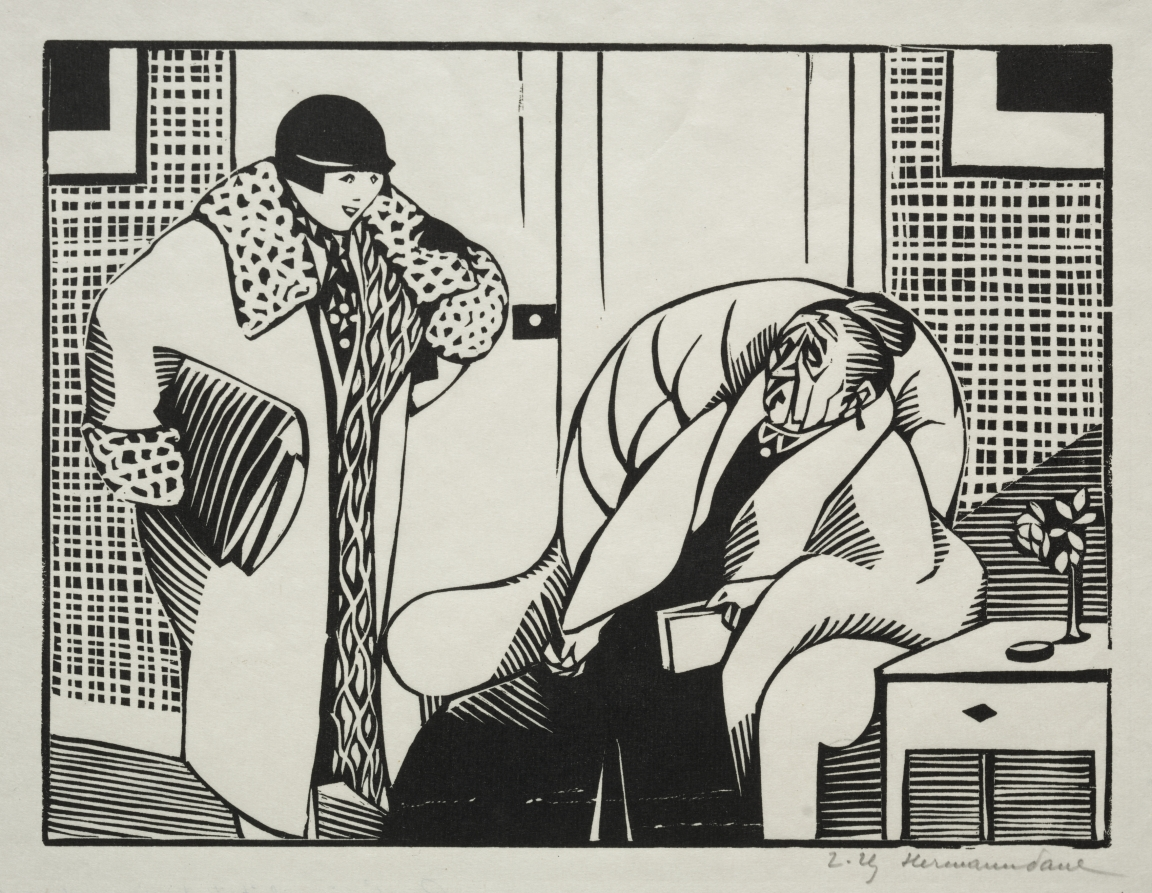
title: Grand'mère, it était passioment aujourd'hui le cours sur Malthus.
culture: France, 20th century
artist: Hermann Paul (French, 1864–1940)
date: c. 1920s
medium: woodcut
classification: Print